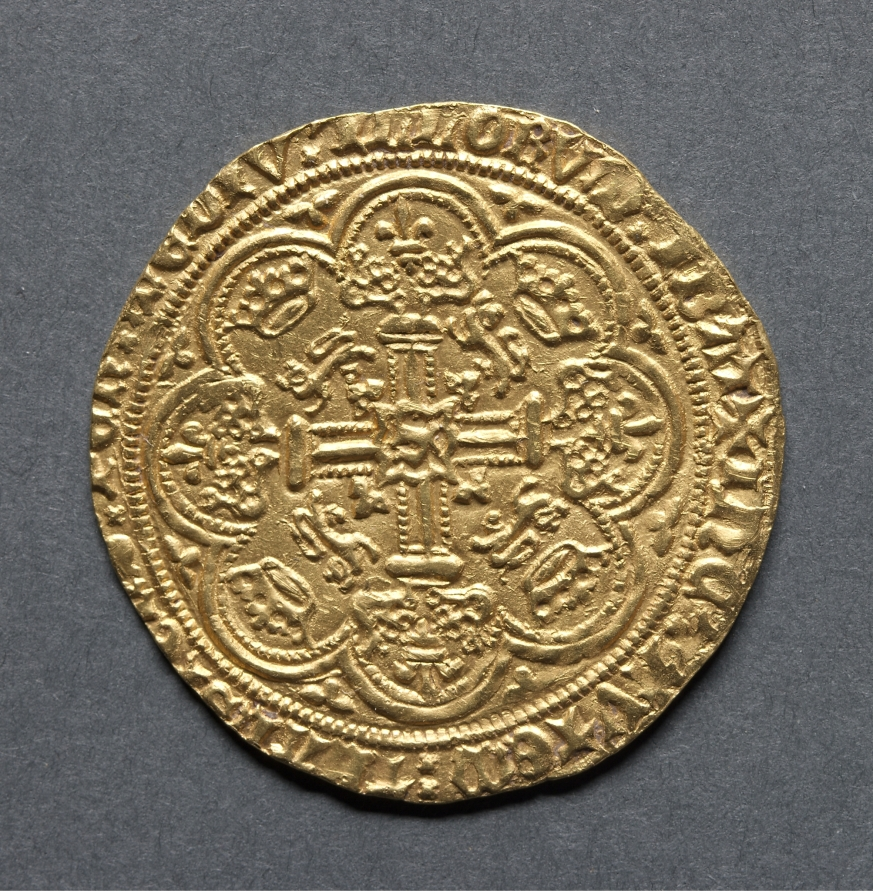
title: Noble: Henry IV Standing in Ship with Shield of Arms (obverse); Ornamental Cross with Lis Terminals (reverse)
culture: England, Henry IV, 1399-1413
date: 1399–1412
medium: gold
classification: Coins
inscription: IhC AVTEM TRANSIENS PER MEDIV ILLORVM IBAT